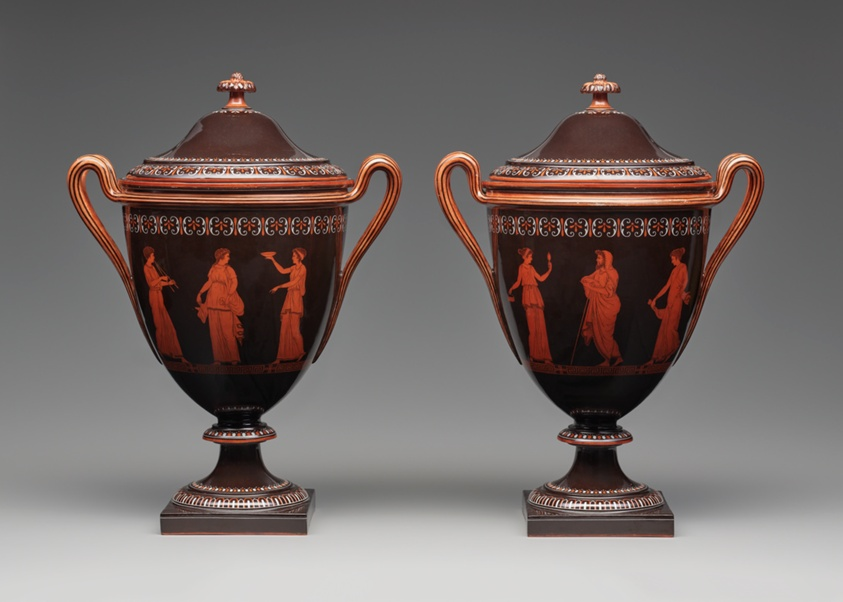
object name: Ceramics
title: Ice Cream Cooler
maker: Vienna State Porcelain Manufactory (Austrian, 1744-1864)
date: 1804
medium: Hard-paste porcelain and enamel decoration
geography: Vienna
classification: tableware; ceramics; porcelain; european decorative arts